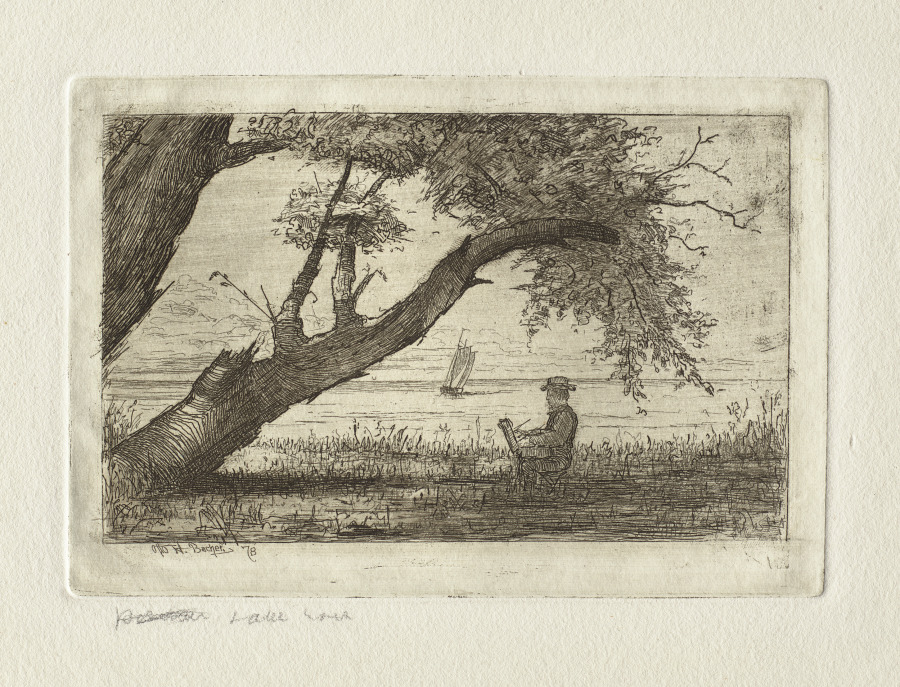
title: Lake Erie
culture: America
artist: Otto H. Bacher (American, 1856–1909)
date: 1878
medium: etching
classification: Print